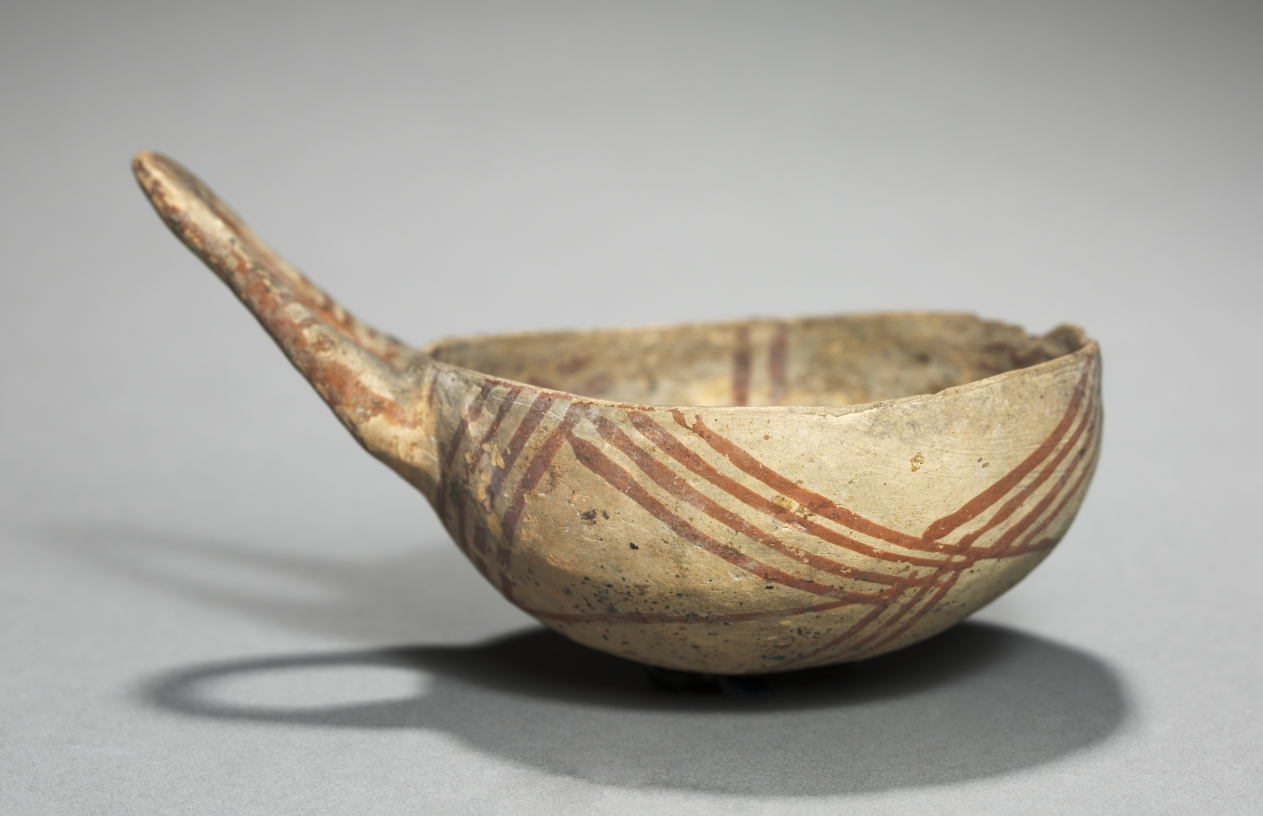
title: One-Handled Bowl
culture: Cyprus, middle Cypriot III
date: c. 1725–1600 BCE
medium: white painted ware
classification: Ceramic